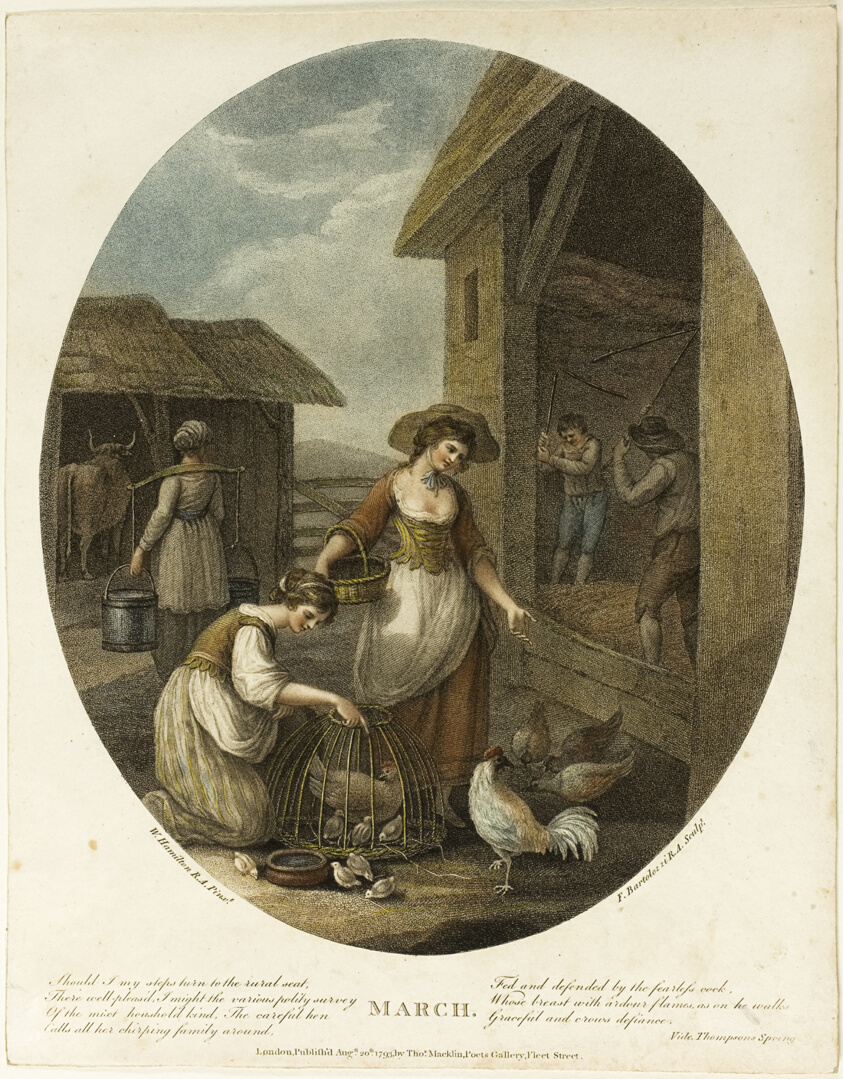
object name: Print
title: March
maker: Francesco Bartolozzi (Italian, 1727-1815); after William Hamilton (English, 1751-1801); published by John and Josiah Boydell (English, 18th century)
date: August 20, 1793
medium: Color stipple engraving on paper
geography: Italy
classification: engraving; print; prints and drawing